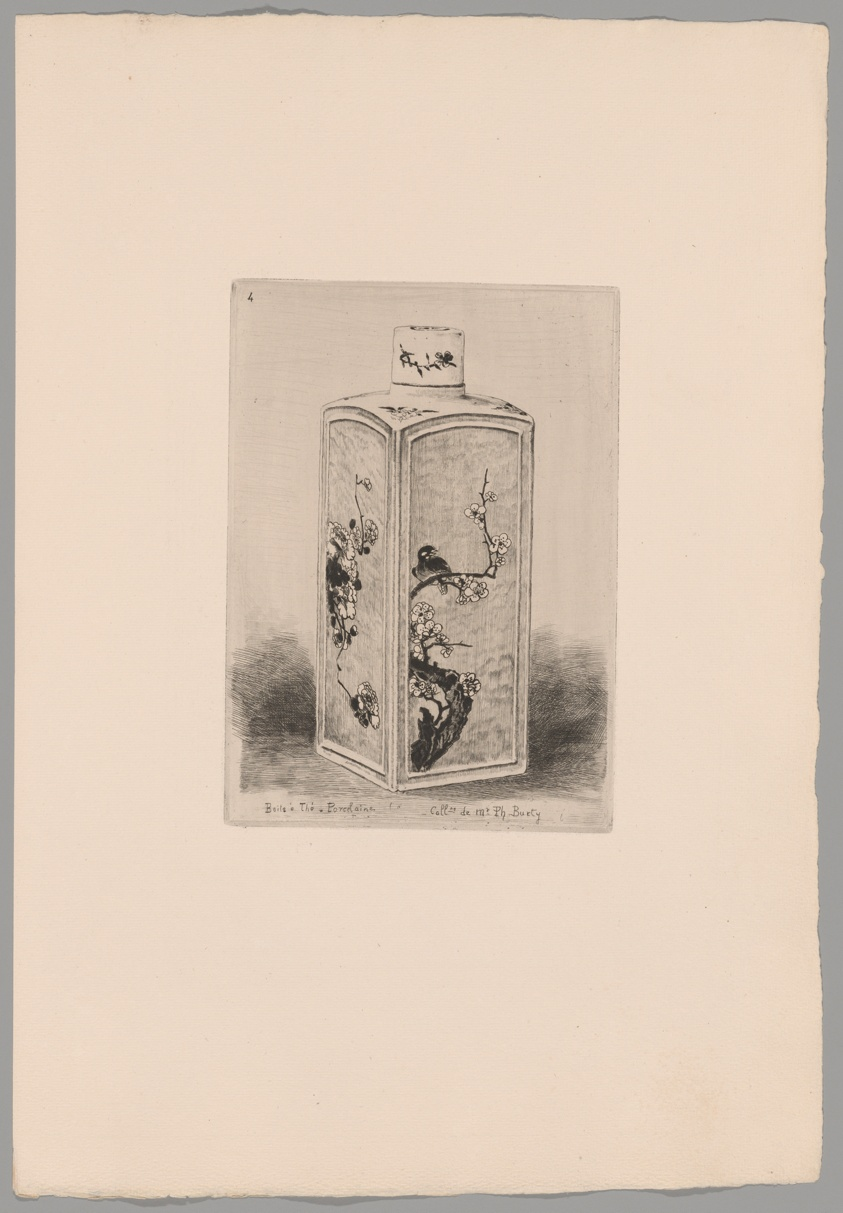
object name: Print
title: Japonisme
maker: Felix Hilaire Buhot; French, 1847-1898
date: 1883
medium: Etching in black ink on cream laid paper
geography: France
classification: prints and drawing; etching; paper; print